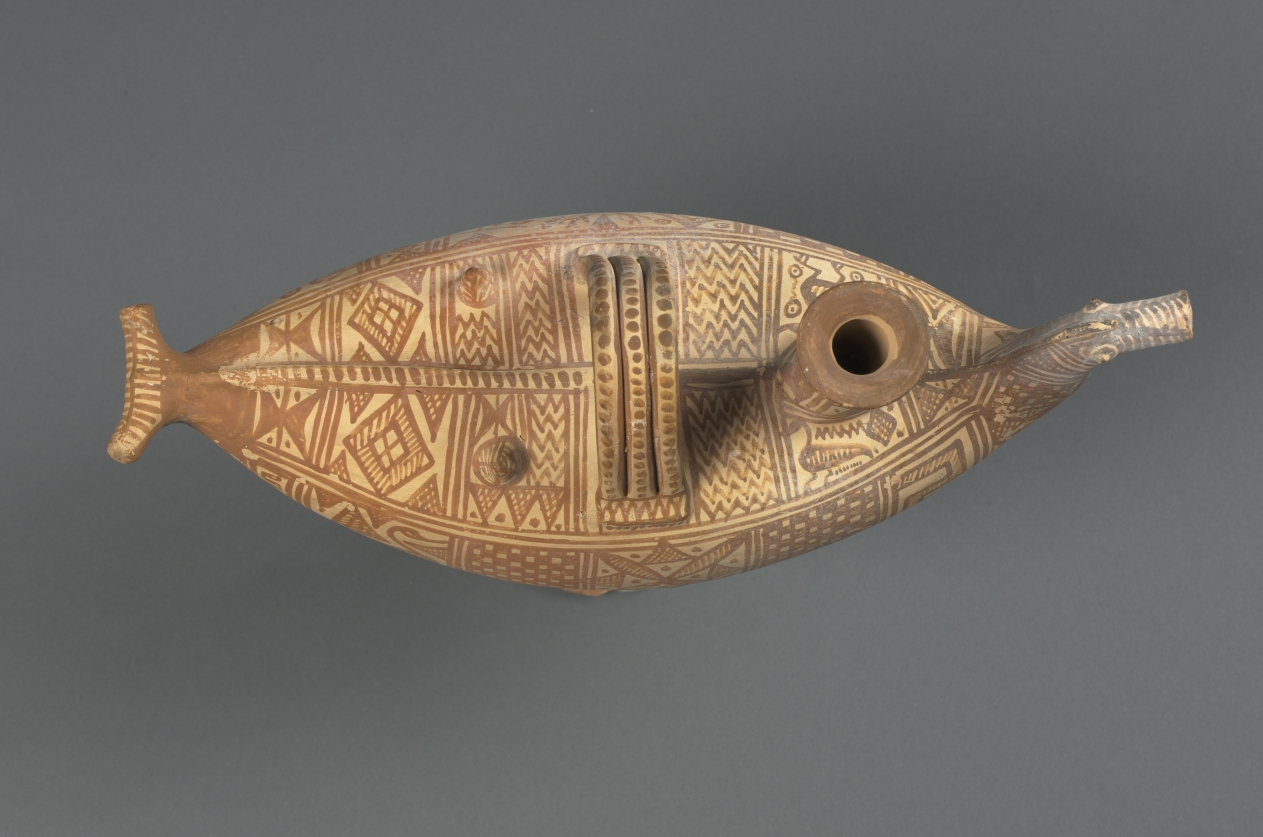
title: Italo-Geometric Bird Askos (Oil Vessel): Hunter (Herakles?) and Stag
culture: Etruscan, likely made at Vulci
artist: attributed to Bisenzio Class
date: c. 700 BCE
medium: ceramic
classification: Ceramic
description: This bird-shaped askos (oil vessel), with a tall filling spout and a pierced beak for pouring, perhaps held perfumed oil for a funerary function. Although the shape likely stems from Italian tradition, the abundantly painted geometric decoration, covering nearly every available surface, derives originally from Greece. Thus scholars have suggested that an immigrant Greek potter working in Etruria may have made the vessel. The sole narrative scene shows a man with a spear leading an antlered animal. If not an anonymous hunter, this could be the earliest known representation of the hero Herakles performing his third labor: capturing the golden-antlered Keryneian hind, or female deer.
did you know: This askos may feature the earliest known representation of Herakles's third labor, the Keryneian hind.